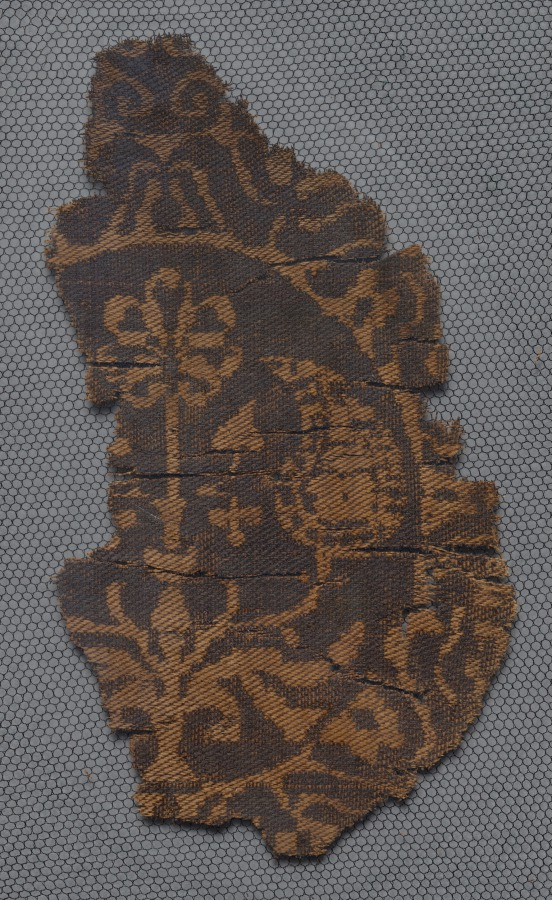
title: Fragment of a Segmentum with Palmette Tree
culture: Syria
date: 7th-8th century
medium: compound twill, silk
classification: Textile